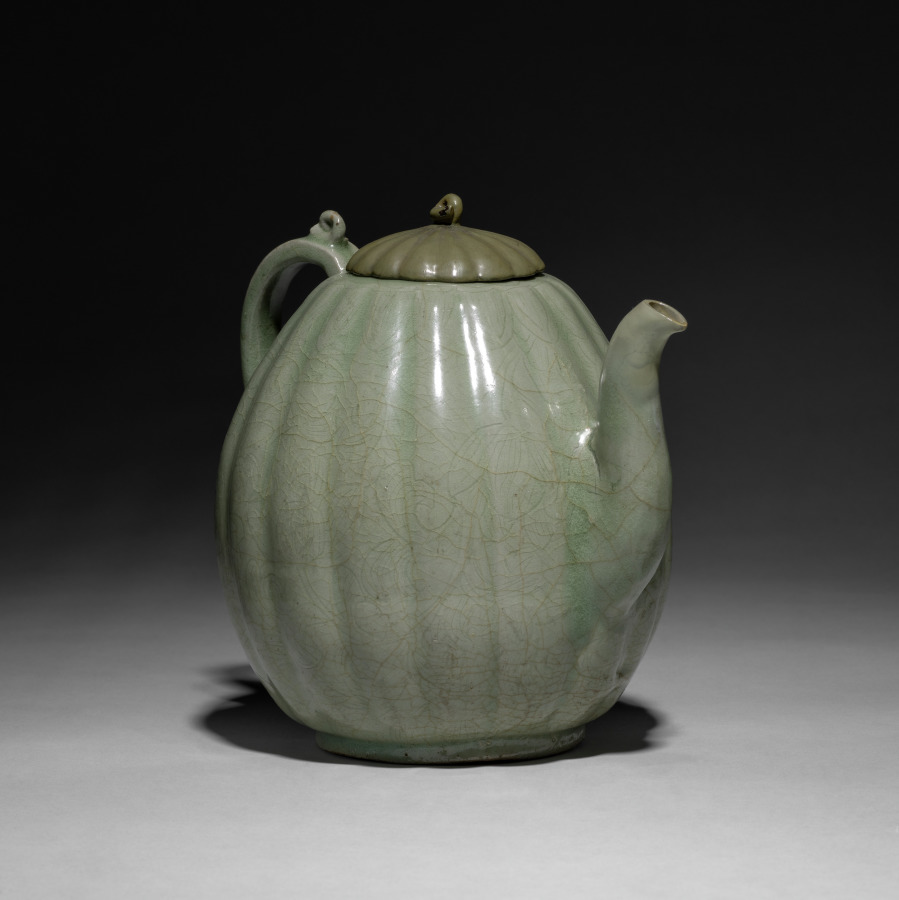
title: Melon-shaped Wine Ewer with Incised Chrysanthemum Design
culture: Korea, Goryeo dynasty (918–1392)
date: 918–1392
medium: pottery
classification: Ceramic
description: As early as the seventh century, the practice of drinking tea and wine became an important part of elite culture in Korea. Elites of the Goryeo period commissioned a variety of types of utensils and vessels including this elegant pot, not only to make their drinking experience more exciting, but also to show their appreciation of nature.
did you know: Originally the lid was not coupled with this pot.